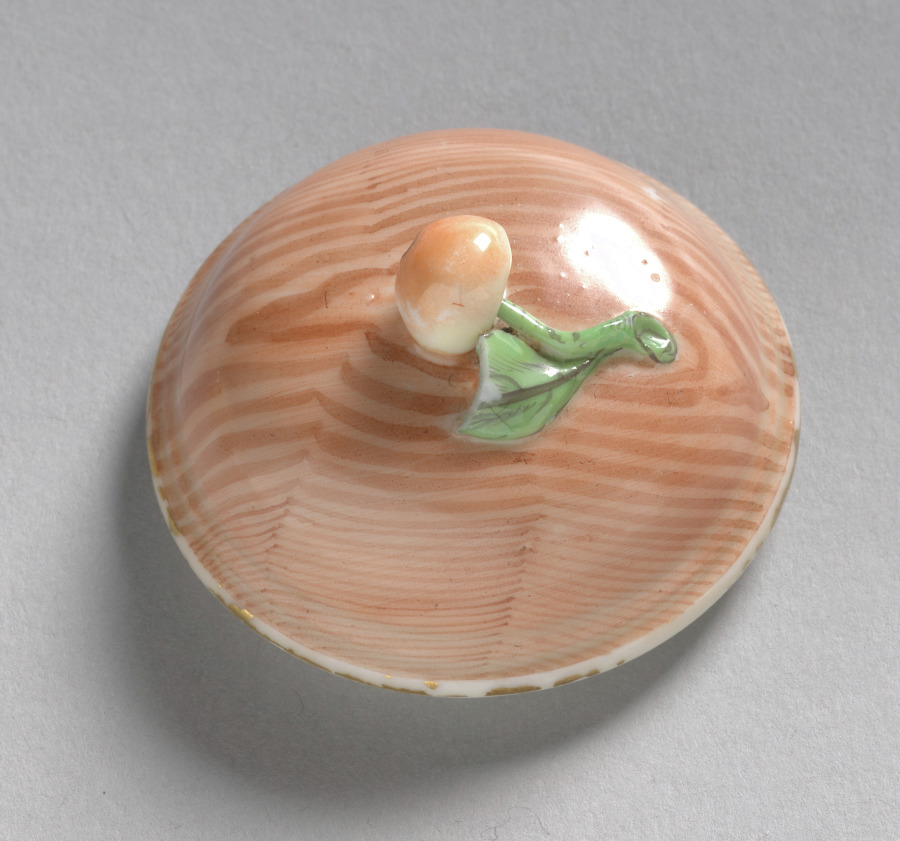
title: Covered Jug (lid)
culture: France, 18th century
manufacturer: Niderviller Factory (French)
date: c. 1780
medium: porcelain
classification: Ceramic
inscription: inscribed at lower right corner of trompe l'oeil print: Niderviller.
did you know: Cream jugs with lids or covers usually held warm cream for coffee or tea.